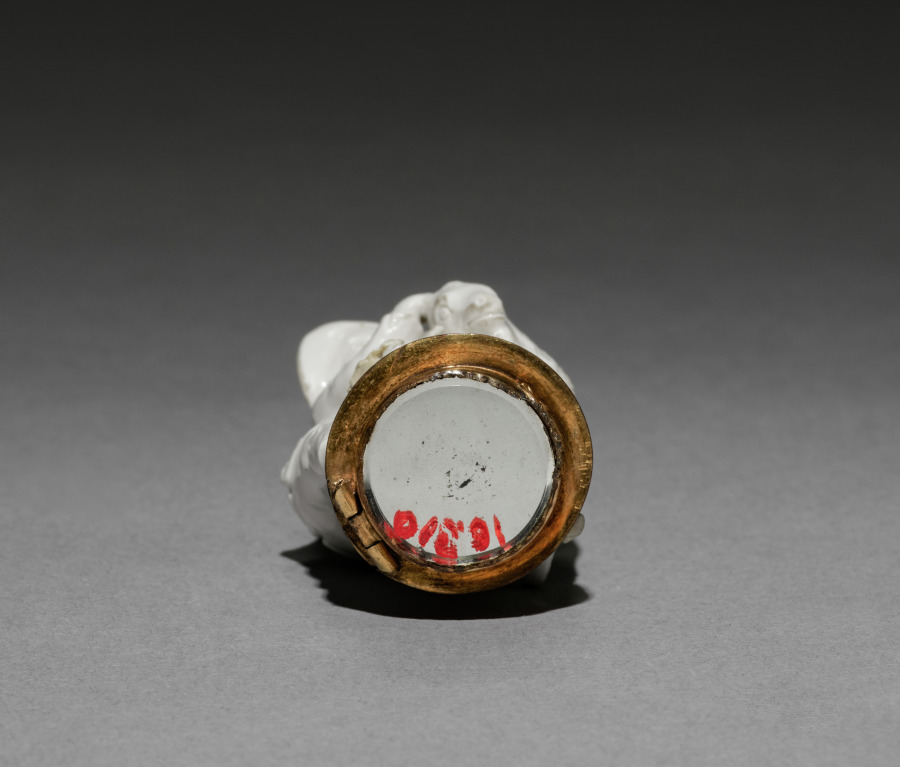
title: Scent Bottle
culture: England, Chelsea, mid-18th century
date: mid 1700s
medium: soft-paste porcelain with gilt metal mounts set with red faceted stones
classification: Miscellaneous